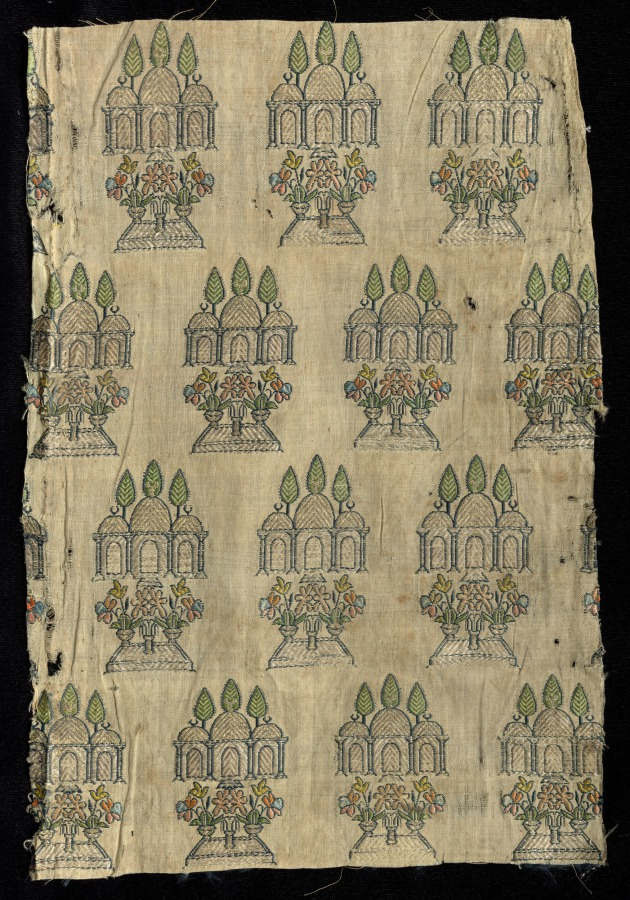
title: Fragment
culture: India, 19th century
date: 1800s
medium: brocade; silk and metal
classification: Textile